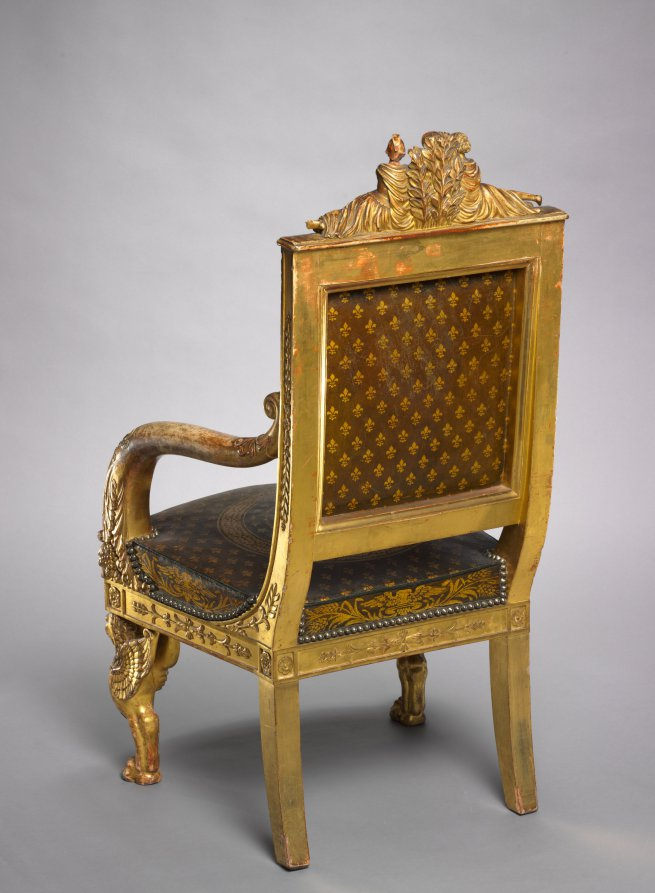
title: Child's Throne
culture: France, Paris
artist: Pierre-Marie Balny le Jeune (French, 1832)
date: 1822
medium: carved and gilded wood, leather upholstery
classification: Furniture and woodwork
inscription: inscribed with stencils inside back rail: BLONDEL TAPISSIER/RUE ST. ANTOINE N 72 1822 inscribed in ink lower edge back rail: 12 JANVIER 18[22?]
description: This chair was made for the young, presumed successor to the French throne who ruled briefly as Henri V in 1830, the last of the direct Bourbon line. He is depicted at the center of the top rail protected by female figures representing France and Minerva, the Roman goddess of wisdom. Fleurs-de-lis and the Gallic rooster, symbols of French royalty and the French people, decorate the upholstery.